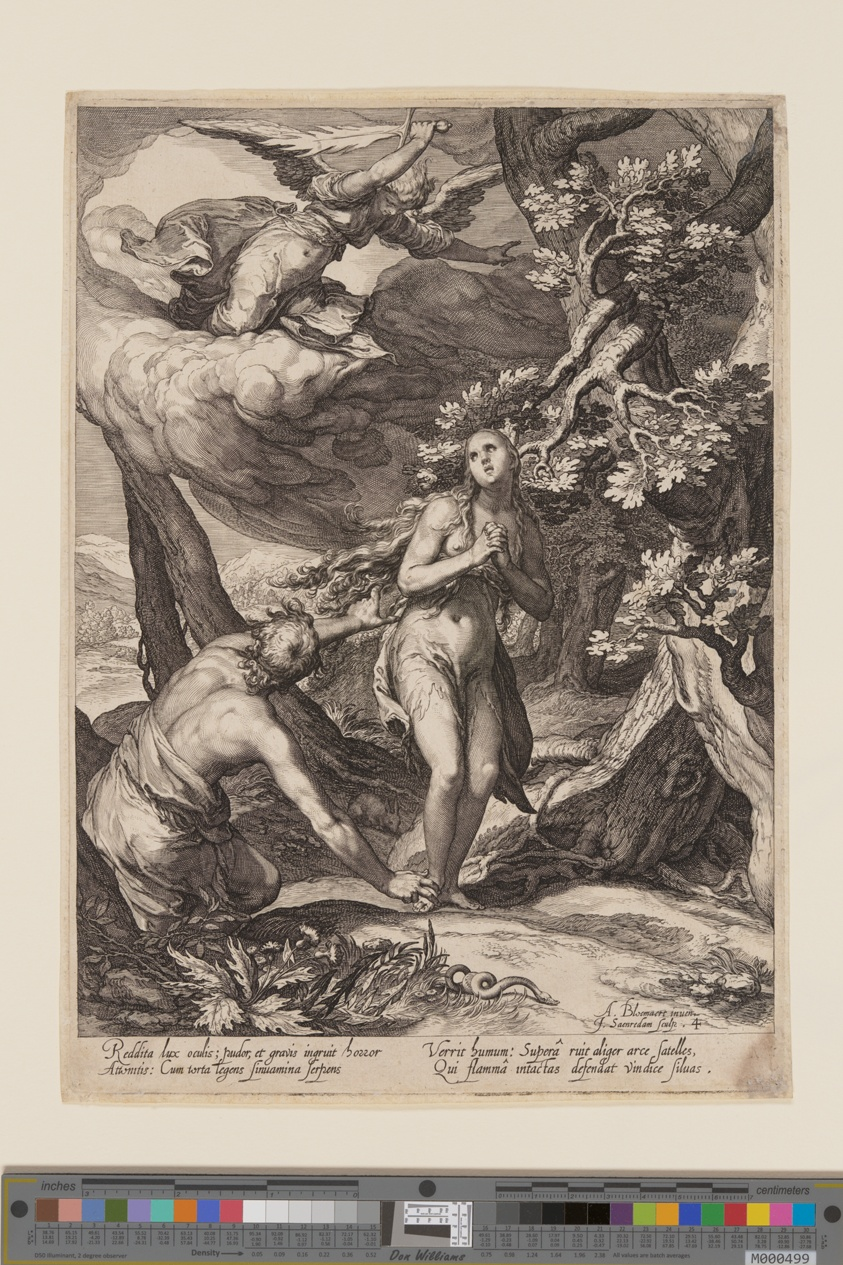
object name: Print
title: Expulsion from Eden, from History of the First Parents of Man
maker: Jan Saenredam (Dutch, 1565–1607); after Abraham Bloemaert (Dutch, 1566–1651)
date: 1604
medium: Engraving on ivory laid paper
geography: Netherlands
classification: engraving; paper; print; prints and drawing